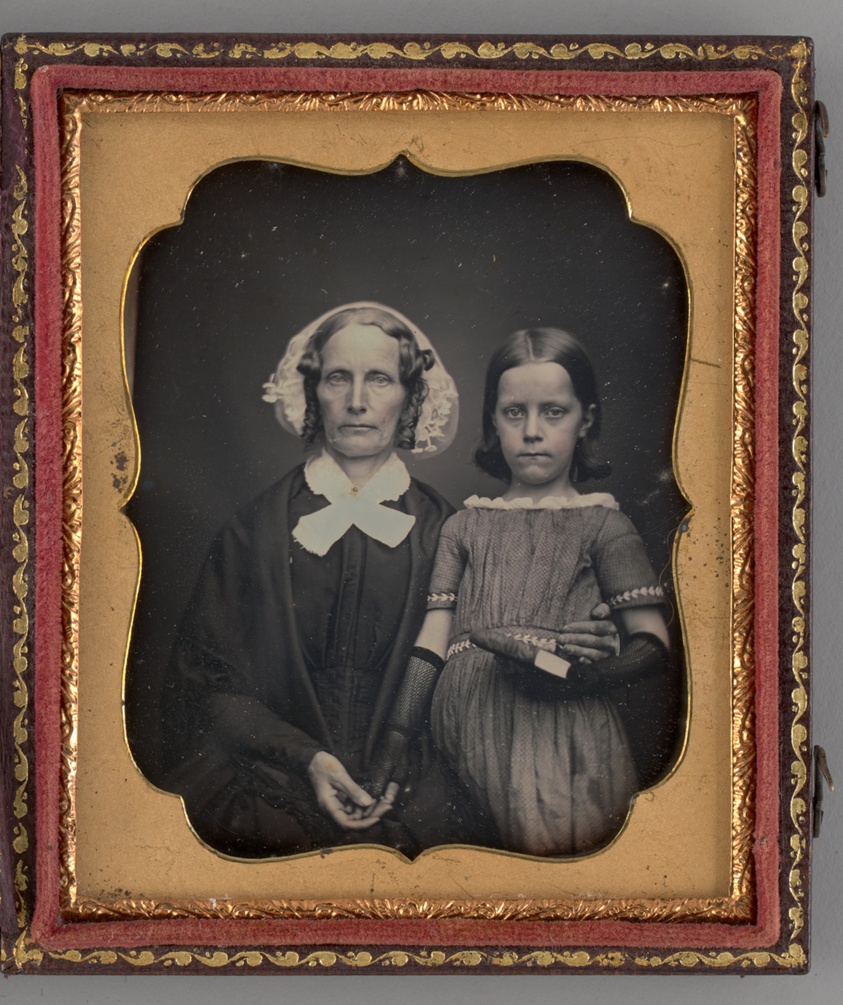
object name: Photograph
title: Untitled (Portrait of a Woman and a Girl)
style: 19th century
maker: Unknown maker; American, 19th century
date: 1855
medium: Daguerreotype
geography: United States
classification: portrait; photograph; photographic process; photography; portrait; daguerreotype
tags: lundberg collection, portraits, portraits: child subject